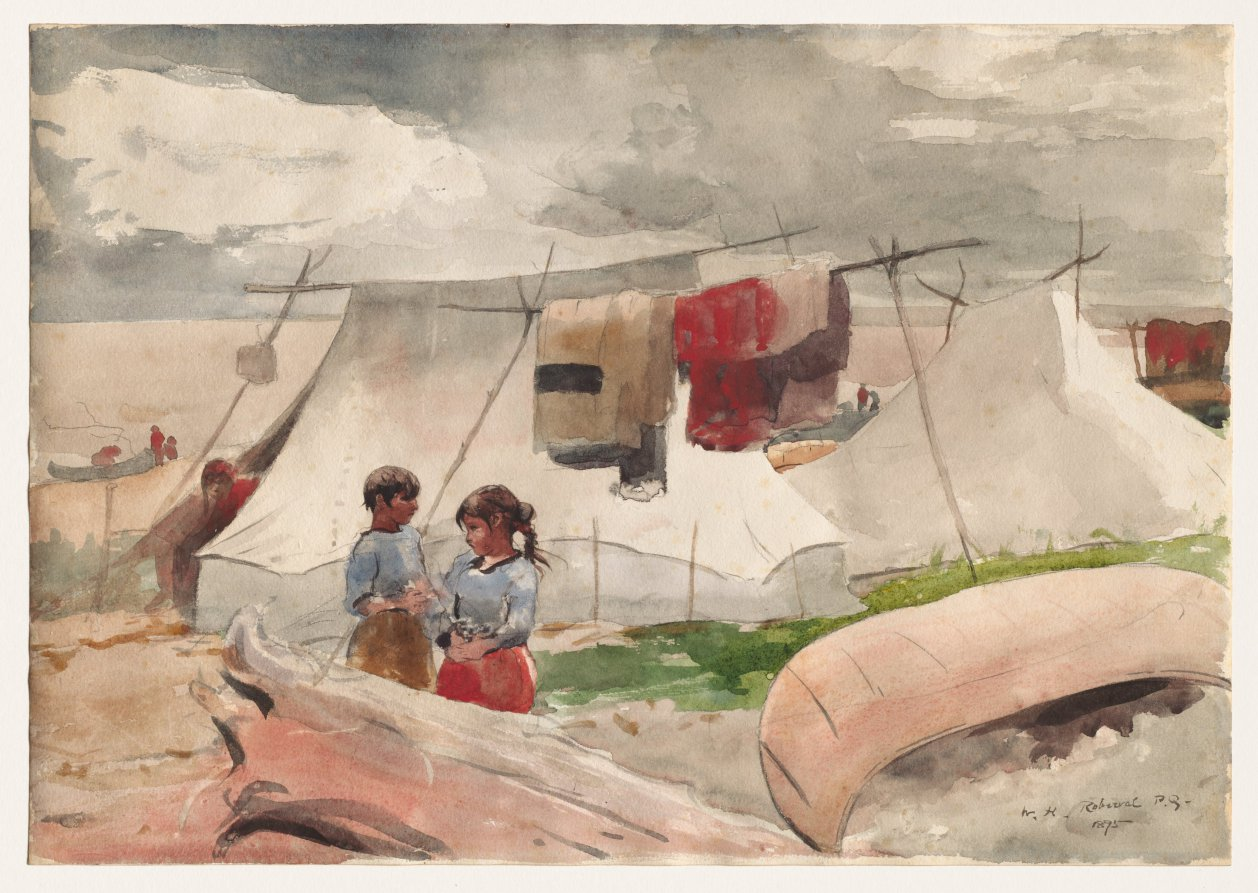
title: Indian Camp, Roberval, P.Q.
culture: America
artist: Winslow Homer (American, 1836–1910)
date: 1895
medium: watercolor with gouache over graphite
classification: Drawing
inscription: signed, lower right, in watercolor: W.H. Roberval P.Q. / 1895 ; VERSO, upper left, in orange crayon: ['9?]6 ; upper center, in orange crayon: No 1 ; lower right, in graphite: Aug 1 [upside down]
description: In 1895, Winslow Homer produced 25 watercolors while on a fishing expedition in Canada. Indian Camp, Roberval, P.Q. was painted at Lake St. John, about 100 miles north of Quebec and shows Montangnais Indians at Pont Bleue. Using straightforward visual material, Homer produced an unusual and arresting composition.